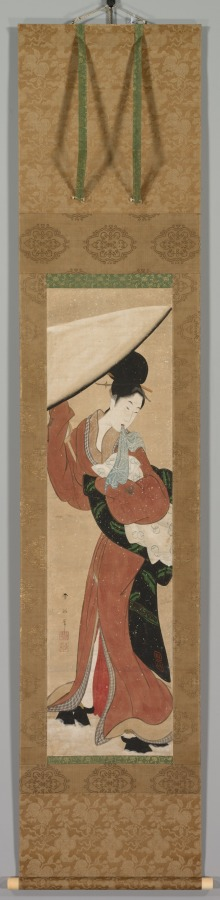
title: Lady with a Parasol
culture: Japan, Edo period (1615–1868)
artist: Koikawa Harumasa (Japanese)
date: early 1800s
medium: hanging scroll; ink, color, gold, and silver pigments on paper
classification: Painting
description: This painting depicts a young woman braving the elements as she hurries home from the local bathhouse. The action depicted accentuates her slender neck and bare legs. In later Japanese art, images of beautiful women in bare feet and a towel between their teeth have sensual overtones.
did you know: Spatters of white paint represent falling snow.